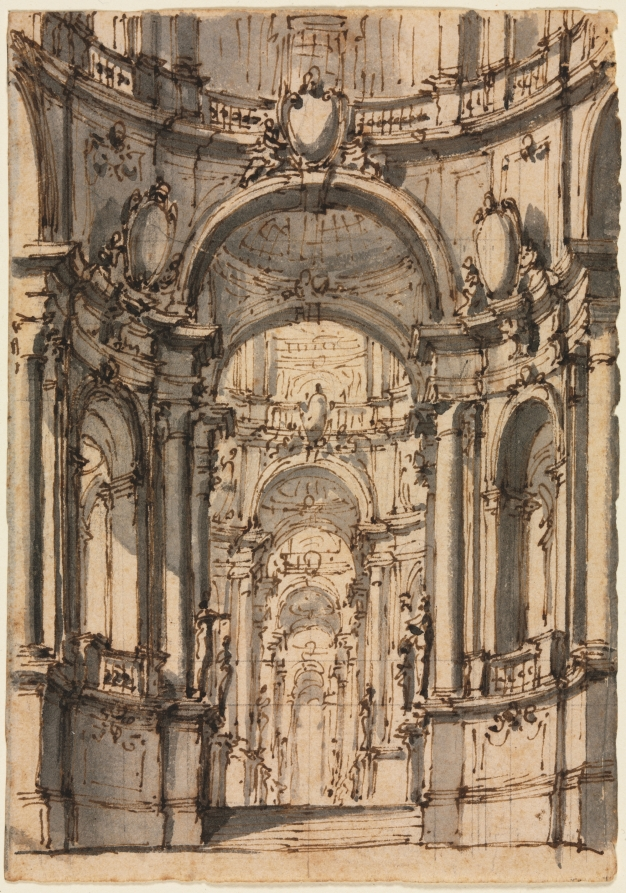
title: Design for a Stage Set: Interior of a Palace with Arcades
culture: Italy, 18th century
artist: Giovanni Battista III Natali (Italian, 1698–1765)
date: mid 1700s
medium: pen and brown ink and brush and gray wash over graphite(?)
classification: Drawing